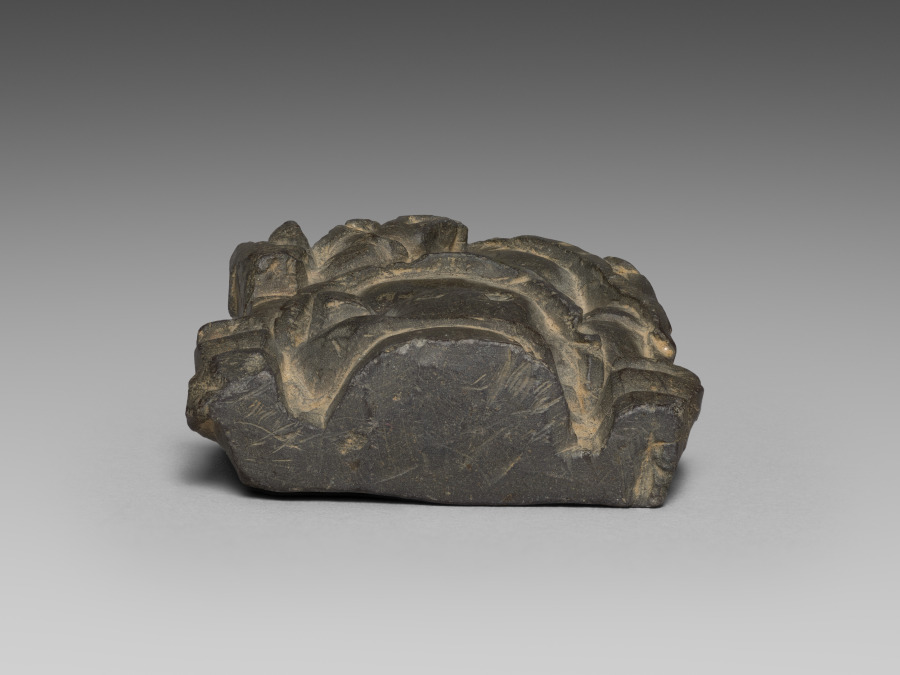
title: Male Figure, Possibly Indra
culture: Pakistan, Gandhara, possibly Swat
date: 300s–400s CE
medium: schist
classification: Sculpture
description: This carving appears to be unfinished, showing only the broad strokes of the male figure. The flat-topped crown is characteristic of Indra, which may be the identity of this figure.